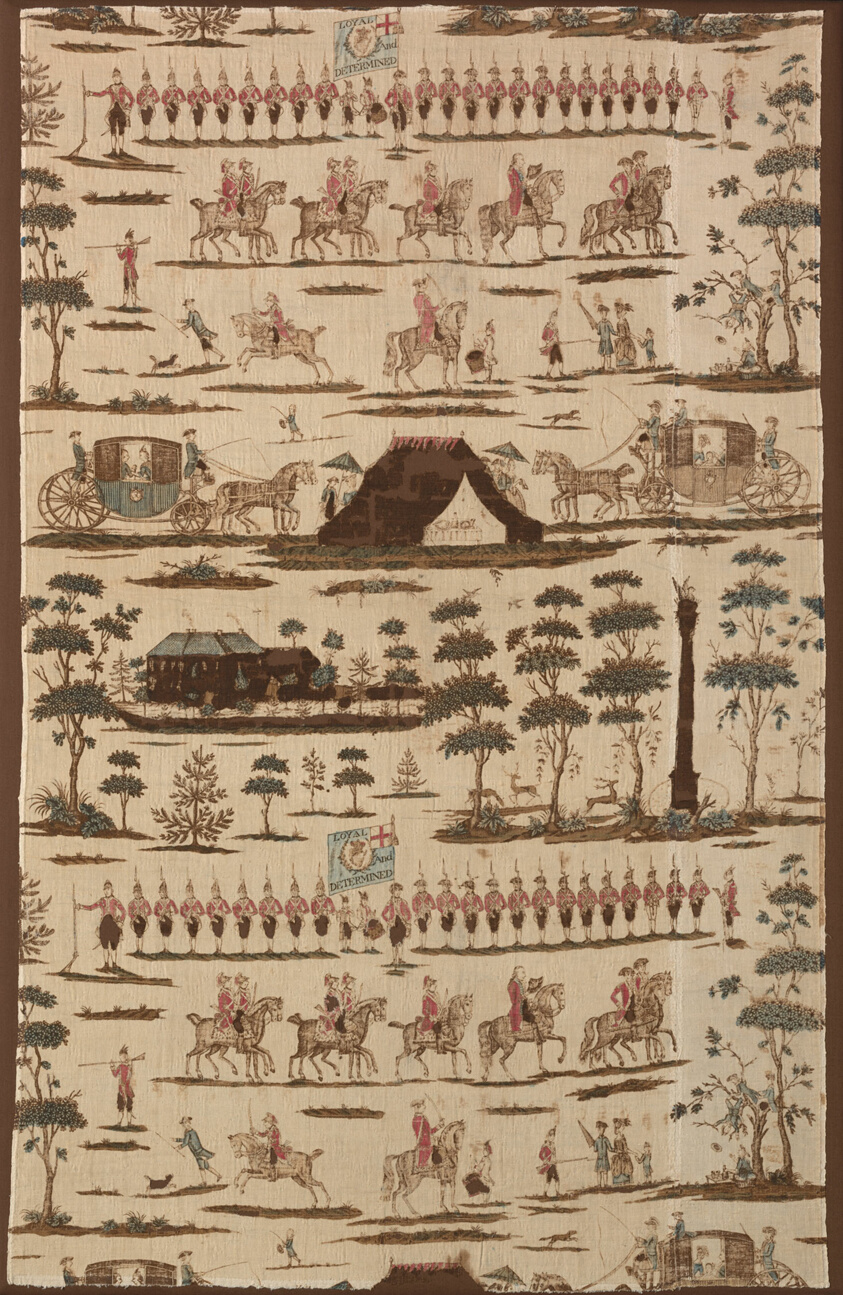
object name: Textile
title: The Irish Volunteers (Furnishing Fabric)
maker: Probably designed by Gabriel Beranger (Irish, 1729–1817); Printed by Thomas Harpur (Irish, active c. 1782); Ireland, County Kildare, Leixlip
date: 1782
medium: Linen and cotton, plain weave; copperplate printed; painted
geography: County Kildare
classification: textile; weaving - printed; furnishing textile